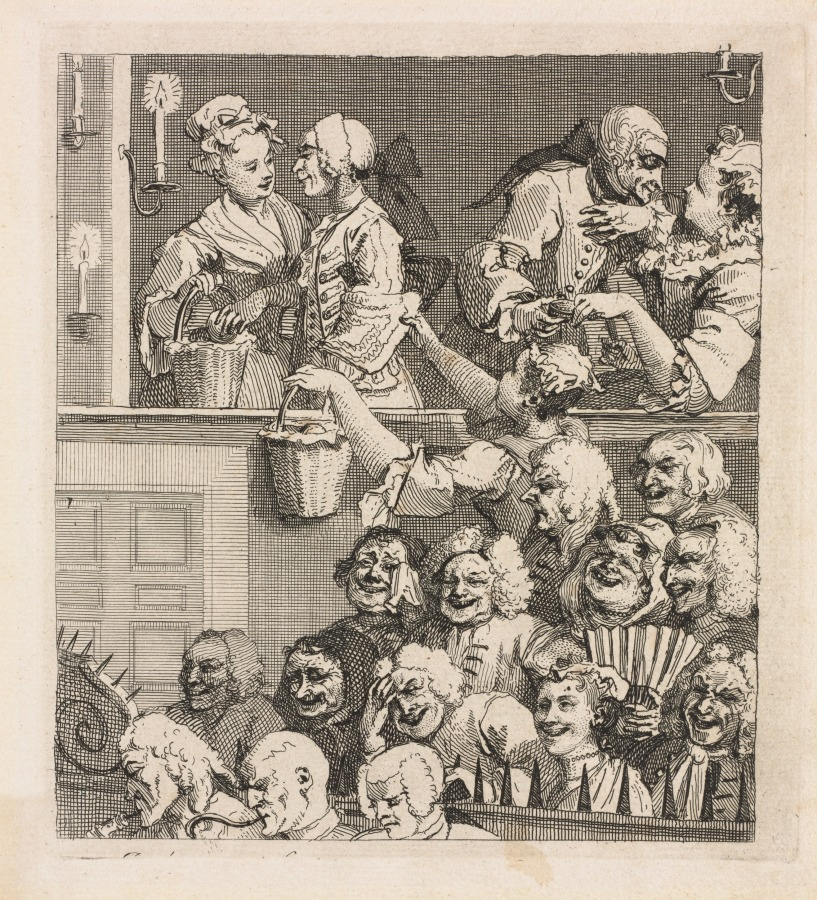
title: The Laughing Audience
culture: England, 18th century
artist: William Hogarth (British, 1697–1764)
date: 1733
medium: etching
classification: Print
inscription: upper right margin, in ink: 63 lower right margin, in graphite: P130iv